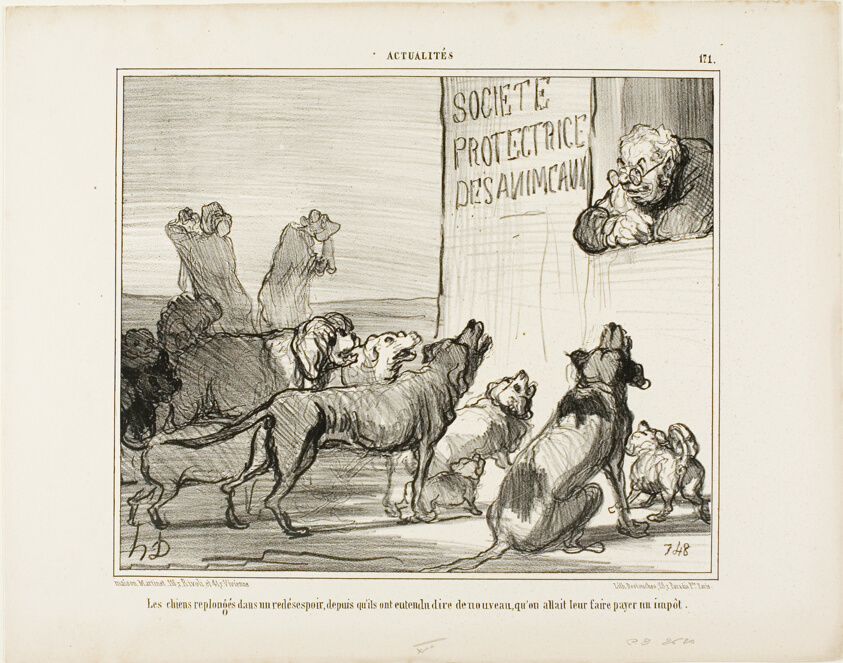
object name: Print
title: The Dogs are Again Falling in Despair After Having Heard that There Will Be a New Dog Licence Tax After All, plate 171 from Actualités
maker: Honoré Victorin Daumier; French, 1808-1879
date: 1855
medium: Lithograph in black on white wove paper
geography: France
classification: lithograph; print; prints and drawing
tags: dogs, animals